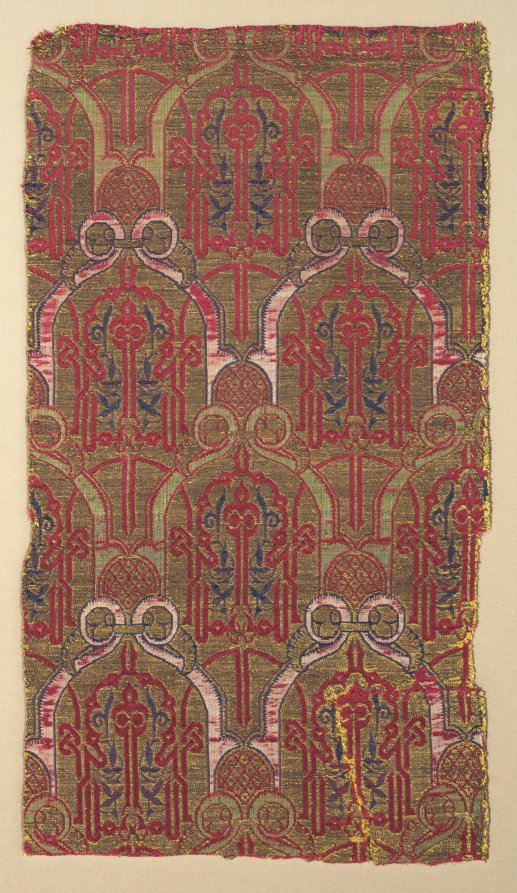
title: Fragment with palmette arches with Alhambra wall pattern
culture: Spain, Granada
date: 1300s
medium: Silk and gilt-metal thread: lampas weave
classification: Textile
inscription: horizontal rows of staggered arch-like forms enclose knotted and interlaced Kufic inscriptions: "Success."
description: This rare, gold-thread silk displays a sophisticated pattern that also decorates the stucco walls of the Alhambra, the imperial palace in Granada. Three superimposed designs form the harmonious pattern on the golden ground. Split-palmette leaves in ivory or green silk form staggered arches displaying a crimson text, Good fortune, written in angular Arabic script with extended strokes that create secondary symmetrical arches. Deep blue palmette leaves create the third level of decoration. The interior walls of the Alhambra would have shimmered with these warm, patterned textiles.